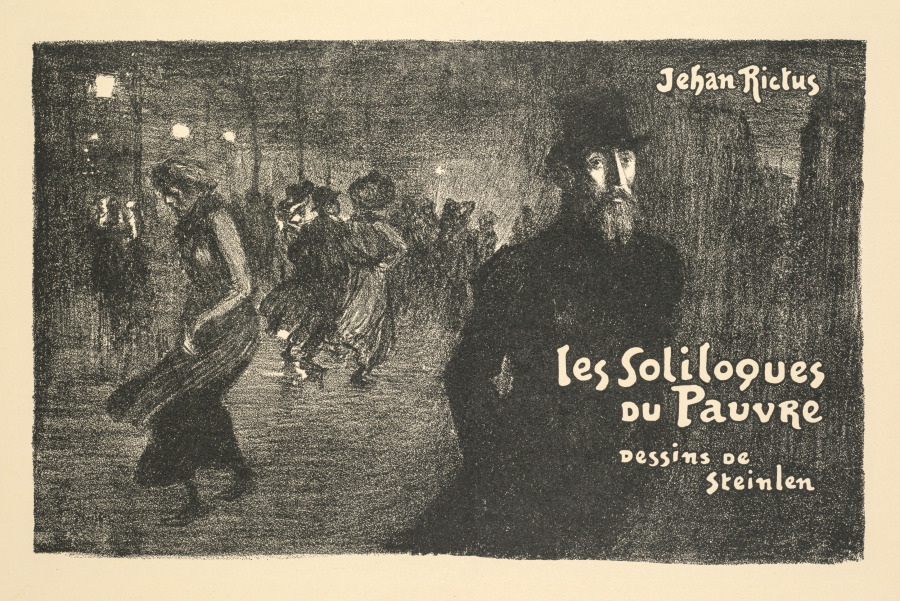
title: Prospectus de Librarie et de Journaux: les soliloques du Pauvre par Jehan Rictus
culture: Switzerland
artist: Théophile Alexandre Steinlen (Swiss, 1859–1923)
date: 1903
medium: lithograph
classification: Print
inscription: On mat, in graphite:? : from: Prospectus du Librairie et de Journaux Crauzat 711